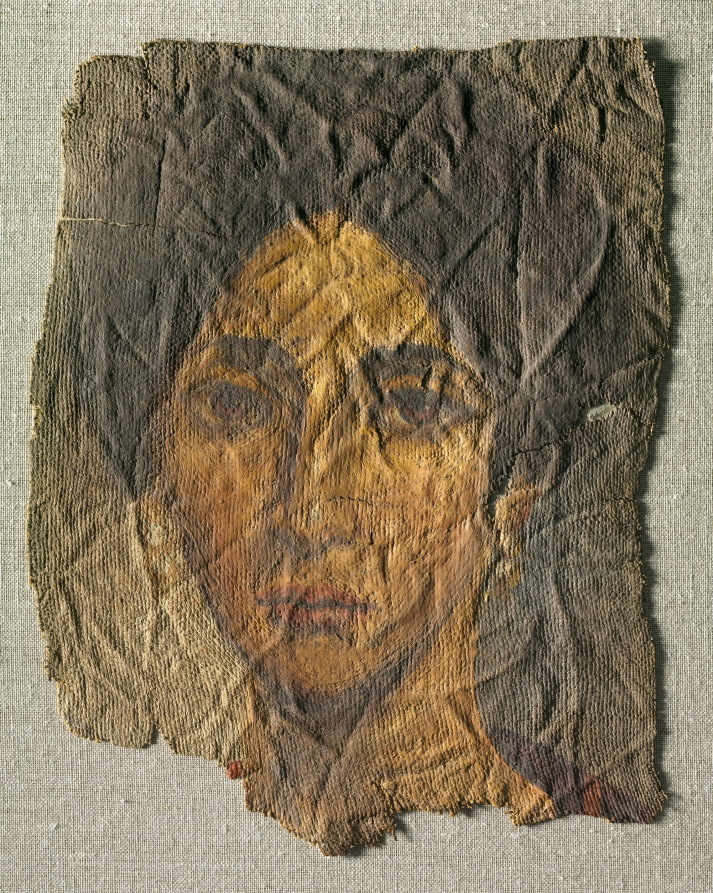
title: Funerary Portrait of a Woman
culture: Egypt, Roman Empire, Antonine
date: c. 138–92 CE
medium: encaustic on linen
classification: Painting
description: So-called mummy portraits were apparently painted during the owners' lives and hung in their homes. At the time of the owner's death, the portrait was taken down, cut from its frame, and trimmed to fit the deceased's mummy, to which it was bound. It was at that time also that the gilding on the center painting was added.